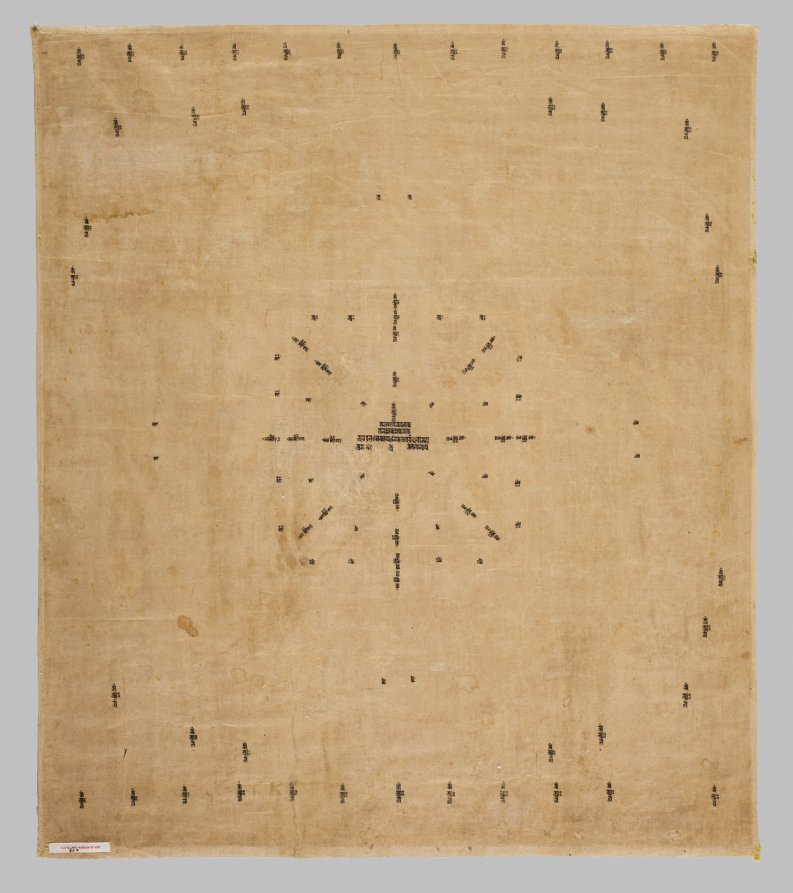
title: Twenty-three Deity Nairatma Mandala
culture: Central Tibet, Sakya-affiliated monastery, 14th century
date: c. 1375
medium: Gum tempera, ink, and gold on cloth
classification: Painting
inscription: The inscription along the bottom says: Twenty-three deity Nairatma Mandala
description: One of the main types of imagery in tantric Buddhist art is the mandala, a two-dimensional diagram of the realm of an enlightened being. This mandala depicts the palace of Nairatma, who dances in the center surrounded by her entourage. Using the painting as a guide, the tantric practitioner in meditation mentally projects the two-dimensional plan into three-dimensional space and enters into it. The outermost ring contains depictions of the cremation grounds, where corpses are being burned and consumed, as well as tantric yogis and masters who work there in order to understand the impermanence of the body, defeat their fear of death, and overcome irrational aversions to impure aspects of life. Virupa is depicted twice, always pointing to arrest the sun with his raised left hand. He sits among the row of lineage masters along the top edge, and is also depicted in the topmost segment of the ring of cremation grounds, being served a cup of liquor. Along with lineage masters at the top of this impressive painting, bodhisattvas and important masters are depicted in the spandrels, each identified by an inscription.